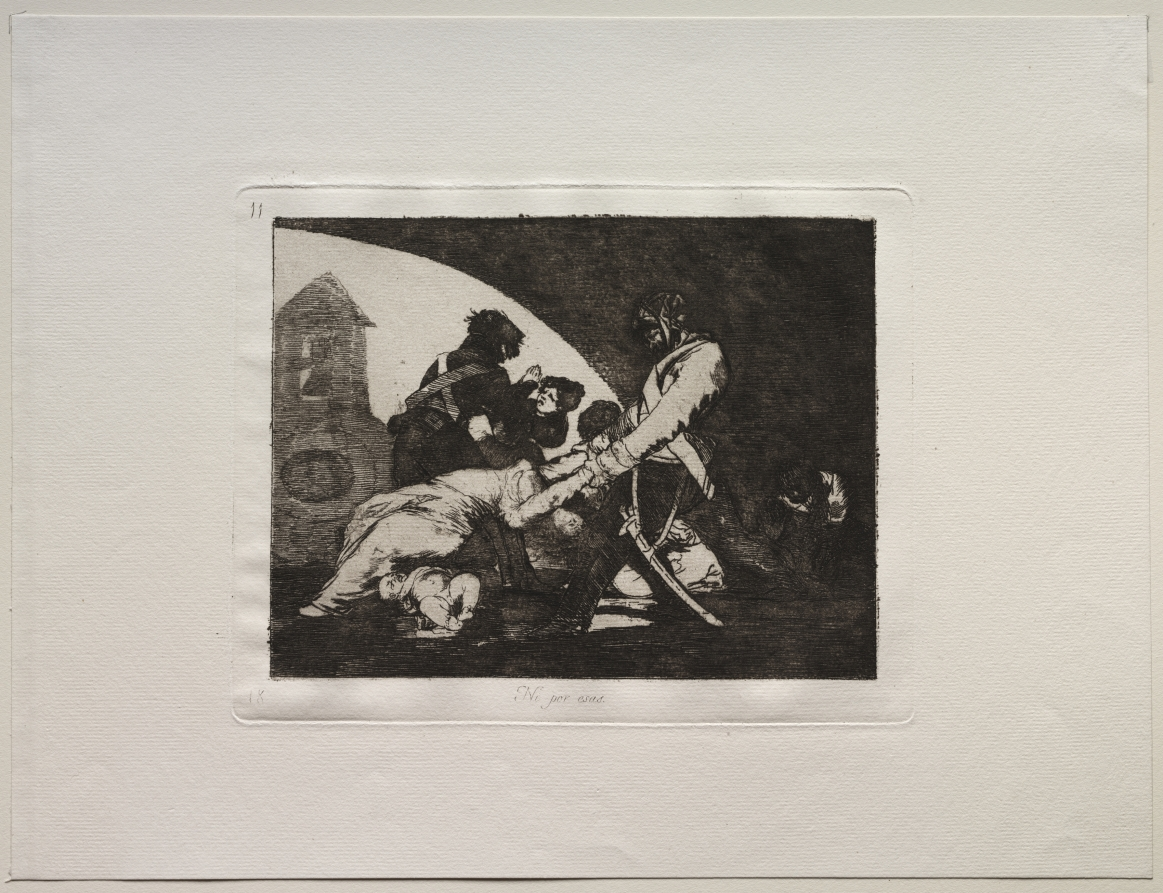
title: The Horrors of War: Neither Do These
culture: Spain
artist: Francisco de Goya (Spanish, 1746–1828)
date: c. 1810–20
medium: etching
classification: Print